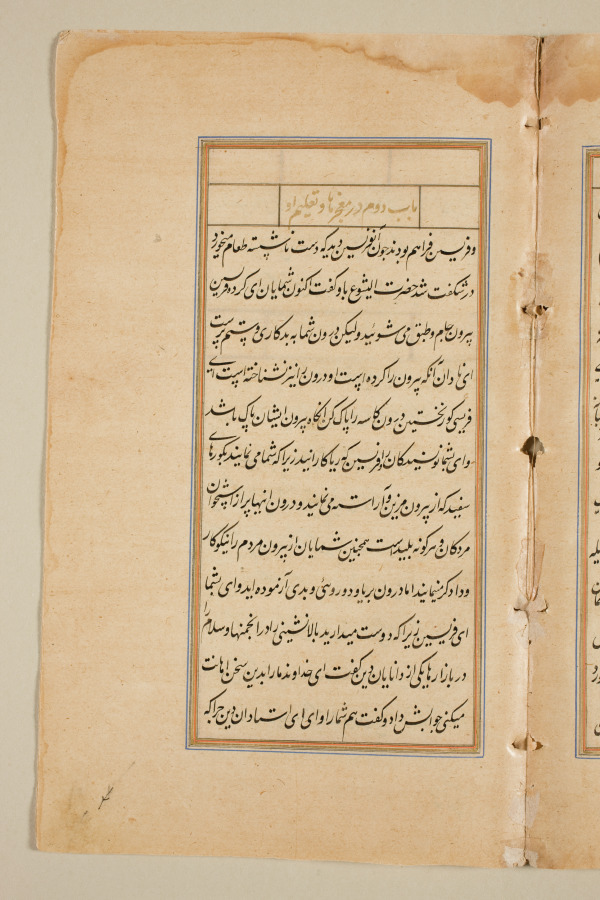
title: Text page from a Mirror of Holiness (Mir’at al-quds) of Father Jerome Xavier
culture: Mughal India, Allahabad, made for Prince Salim (1569–1627)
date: 1602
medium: Ink and gold on paper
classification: Manuscript